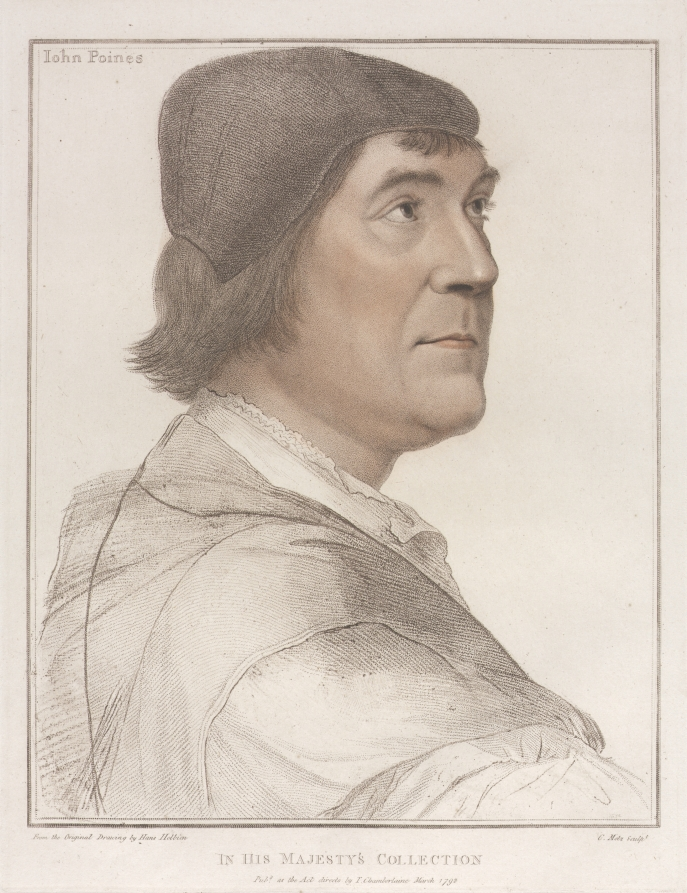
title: John Poines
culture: Germany, 18th century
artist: Conrad Martin Metz (German, 1749–1827)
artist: after Hans Holbein (German, c. 1465–1524)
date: 1792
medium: stipple hand-colored with watercolor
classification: Print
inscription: Printed bottom margin: "From the original drawing by Hans Holbein C. Metz sculpt In His Majesty's Collection Pubd as the act directs by T. Chamberlaine March 1792"